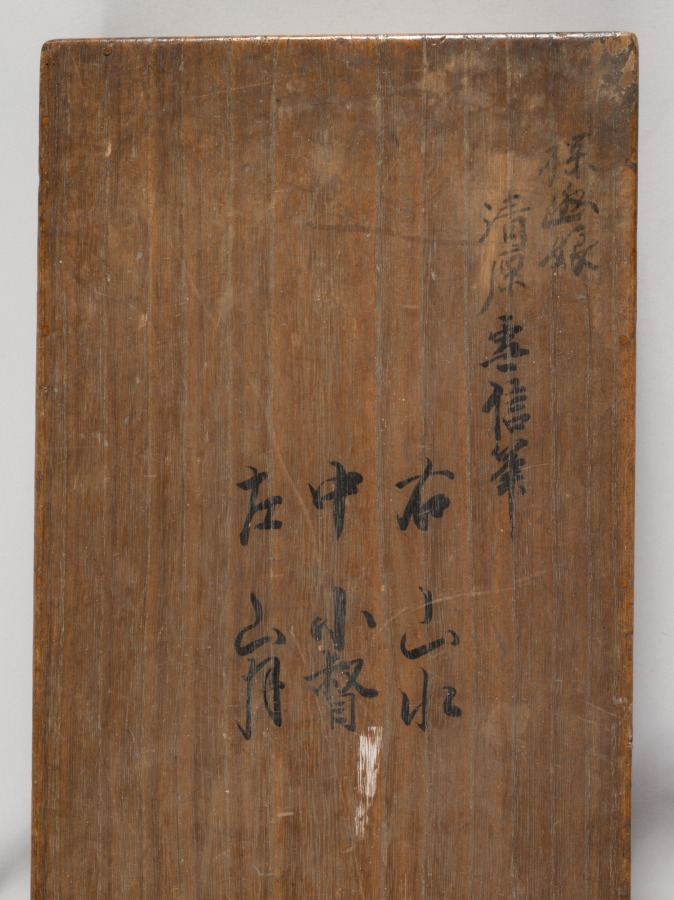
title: Minamoto no Nakakuni Visits Lady Kogō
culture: Japan, Edo period (1615–1868)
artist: Kiyohara Yukinobu (Japanese, 1643–1682)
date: late 1600s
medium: Triptych of hanging scrolls; ink and color on silk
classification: Painting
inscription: 款記「清原氏女雪信筆」/「清原女」朱文八角印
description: An aristocrat rides up a path to a residence where a woman plays a koto, a stringed instrument. The central composition is flanked on the right by a day-lit spring scene, and on the left by a nocturnal autumnal scene. The triptych presents an episode from The Tale of the Heike in which Minamoto no Nakakuni is sent by the emperor to look for Lady Kogō.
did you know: The Tale of the Heike chronicles the conflict between the Taira (Heike) and Minamoto (Genji) families in the late 12th century.